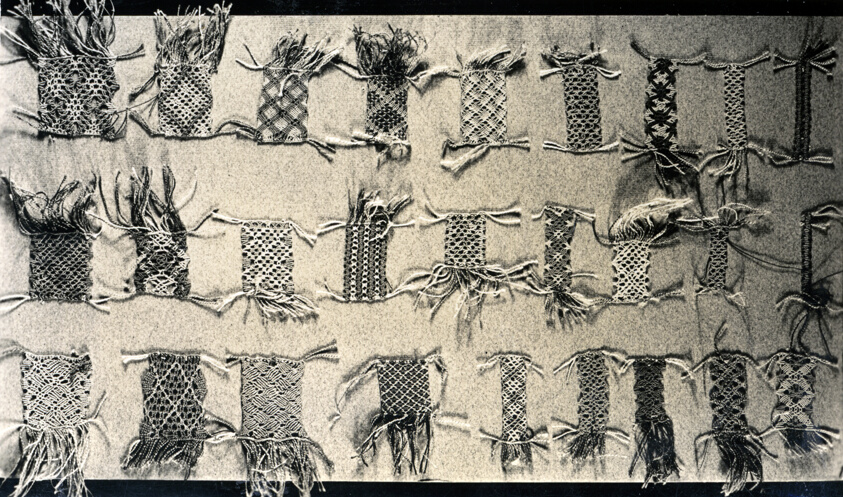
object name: Textile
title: Fifty-five Braid Samples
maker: England, Germany, or Italy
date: 1775/1825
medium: Silk, macramé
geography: England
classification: textile; needlework (visual works)